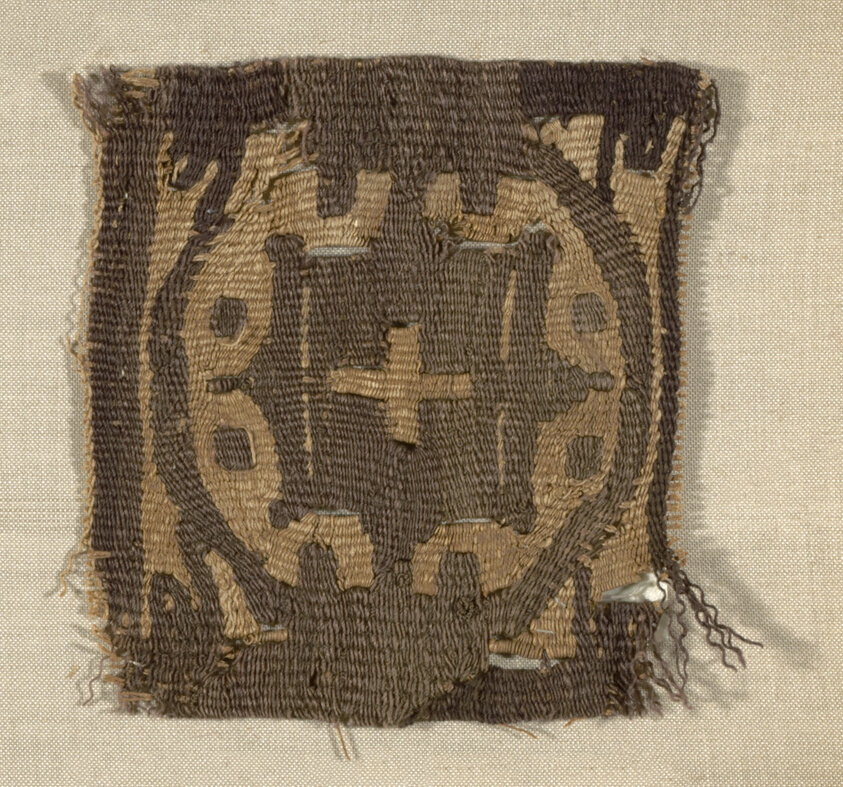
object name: Textile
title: Fragment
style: roman period (egyptian)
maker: Coptic (Egypt)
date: Roman period (30 B.C.– 641 A.D.), 5th/6th century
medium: Wool and linen, tapestry weave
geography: Egypt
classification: textile; weaving